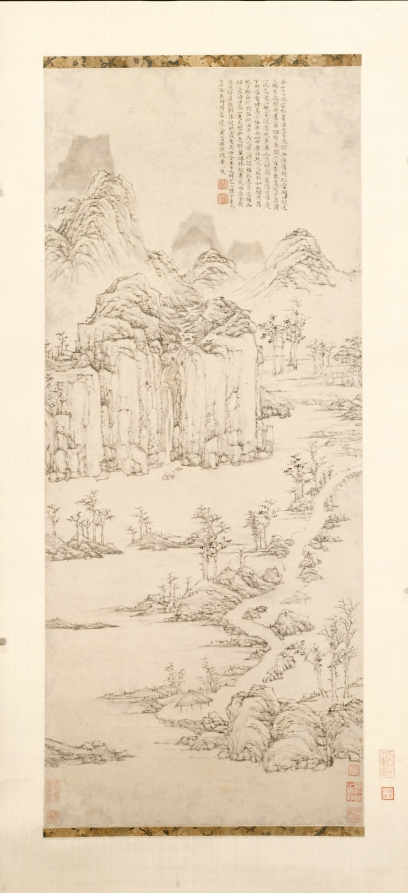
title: Daoist Retreat in Mountain and Stream (Landscape after Ni Zan [1301–1374])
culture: China, Ming dynasty (1368–1644)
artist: Lu Zhi (Chinese, 1496–1576)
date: 1567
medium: hanging scroll; ink on paper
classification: Painting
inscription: Artist's inscription, signature, and 3 seals: In my youthful days I liked to imitate the ink method of Yün-lin [Ni Tsan]. Mr. Wen, the academician [Wen Cheng-ming], remarked that I barely succeeded in achieving some resemblance. He once honored me with the inscription "lofty and imperturbable indeed was the personality of Ni Yü [Ni, the Odd]. Pale ink and blue smoke were formed by his scribbling brush. His surviving works have become so rare in the last two hundred years; only Pao-shan [Lu Chih] carries on his true tradition." In my older years, having to comply with frequent requests for paintings, my brushwork has become stronger than before and I thought to myself that I may have surpassed the Old Master. In the ting-mou year of the Lung-ch'ing era [1567] a friend brought a small painting [by Ni Tsan] and showed it to me in the mountains. I studied and enjoyed it for a long time, then realized that I was actually inferior. This gave me second thoughts about my earlier style, so I selected a piece of old window paper and did this painting in imitation. My friend was kind enough to say that it was truly a quick and close resemblance. I then wrote a colophon and presented the painting to him. My poem says: High mountains and distant waters are the thoughts coming from the lute; The drunken leaves and the sparse woods are merely flowers in the mirror. This idea, I'm sure, will be understood by Tzu-ch'i, one who appreciates my art, It is for him that I have painted on thin paper with light touches, The cloudy color of an autumn evening. This is the winter solstice of the same year. By then, Pao-shan, Mr. Lu, was already over seventy years of age. Could it be that one's brush also gets old together with one's age, as the saying goes. I put down my brush with a laugh. [2 seals] Lu Shu-p'ing shih, Pao-shan tzu. [seal, bottom left corner] Lu Chih shu-p'ing. trans. WKH 6 additional seals of Chu Ching-hou (n.d.).